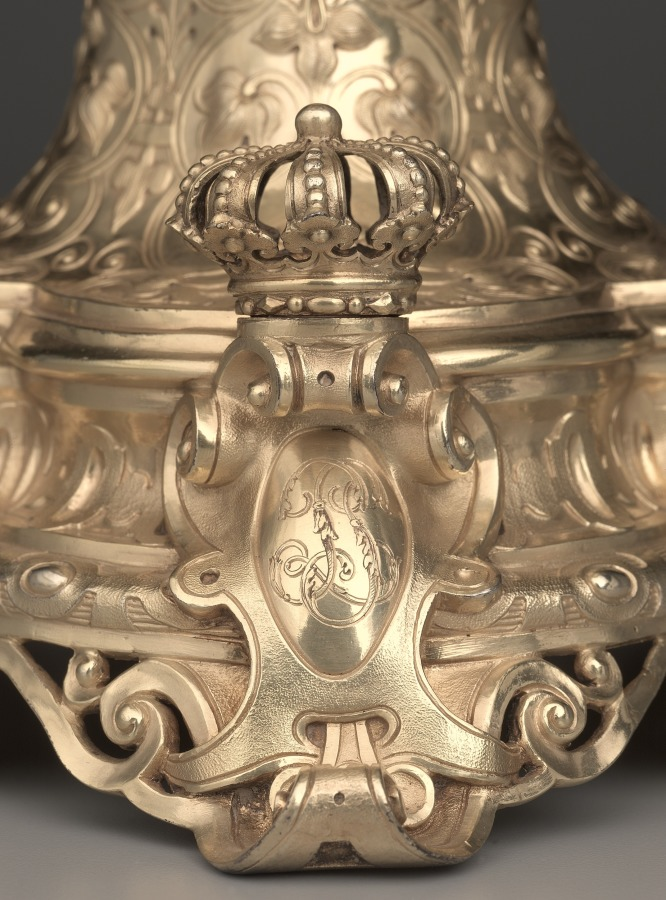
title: Centerpiece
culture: France, 19th century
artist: Charles-Nicolas Odiot (French, 1826–1868)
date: 1838–1848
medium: silver gilt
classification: Metalwork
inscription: engraved inside base: "ODIOT ORFEVRE DU ROI A PARIS"; engraved beneath crowns: "LP" (conjoined for King Louis Philippe of France).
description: Made for Louis Philippe (1773-1850), King of France 1830-48.